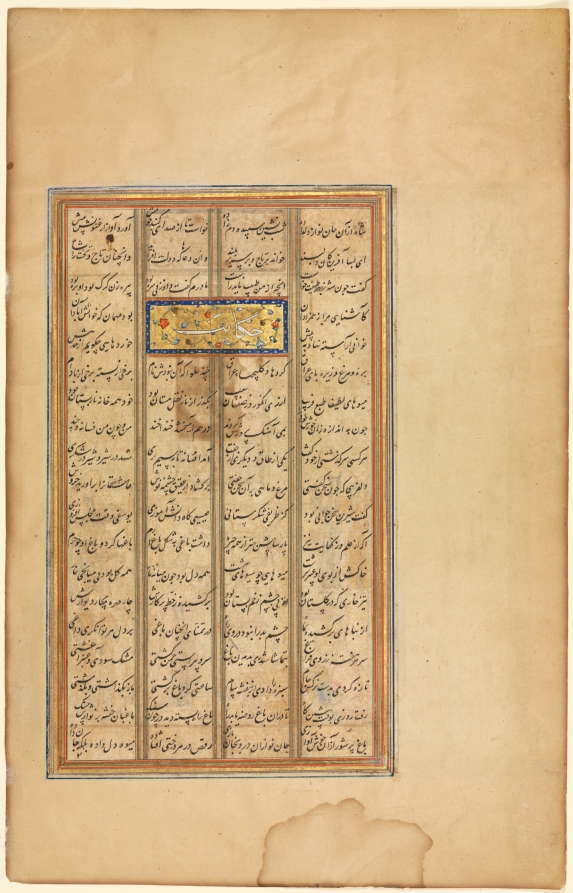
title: Text in Khamsa of Nizami (verso), from a Haft Paykar (Seven Portraits) of Nizami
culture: Iran, Shiraz, Safavid period (1501-1722)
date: c. 1560–80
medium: opaque watercolor, ink, and gold on paper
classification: Manuscript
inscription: Script: Nasta'liq